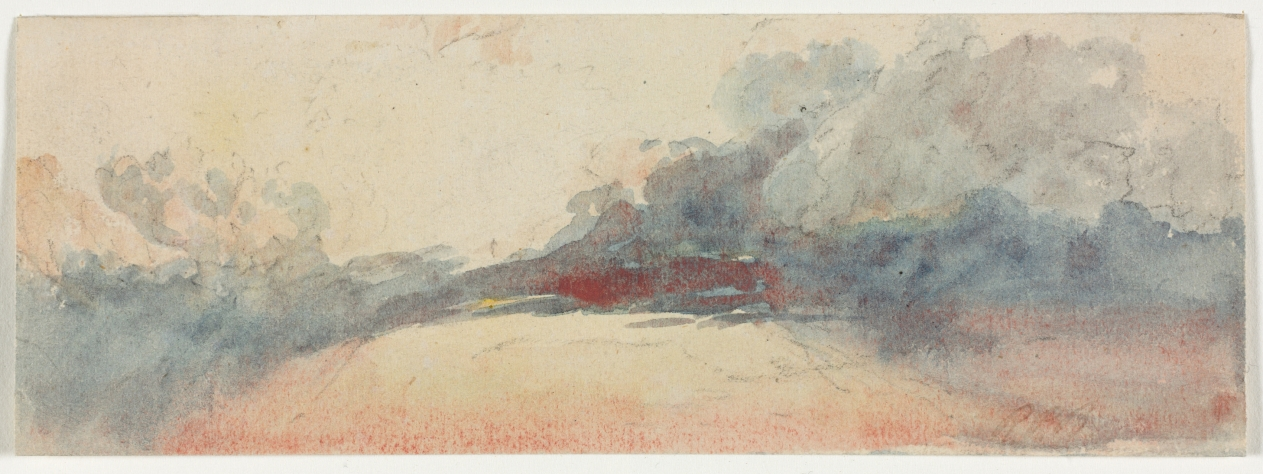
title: Cloud Study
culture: England, 19th century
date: 1800s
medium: watercolor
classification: Drawing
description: Many English watercolorists of the period were especially interested in capturing natural effects of the landscape, such as cloud formations. Such studies were of particular interest to the French Impressionists.